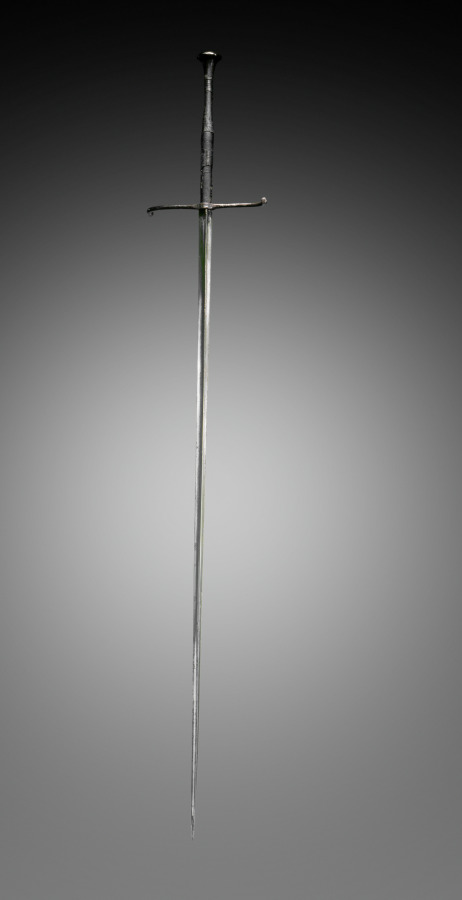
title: Estoc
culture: Germany, early 16th Century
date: early 1500s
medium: steel, wood and leather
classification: Arms and Armor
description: The French word estoc means "thrust" and therefore was adopted as the name for this long thrusting sword. It has a fairly long grip and simple cross-shaped hilt. The rigid blade, designed for thrusting at armored opponents, is three-sided for strength. The estoc was sometimes carried from the saddle. From the early 1300s, it was used by cavalrymen as an auxiliary side arm when a horseman had dismounted.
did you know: Swords like this one were developed to counteract and pierce the increasingly heavy armor and sophisticated plates that nearly covered a knight.